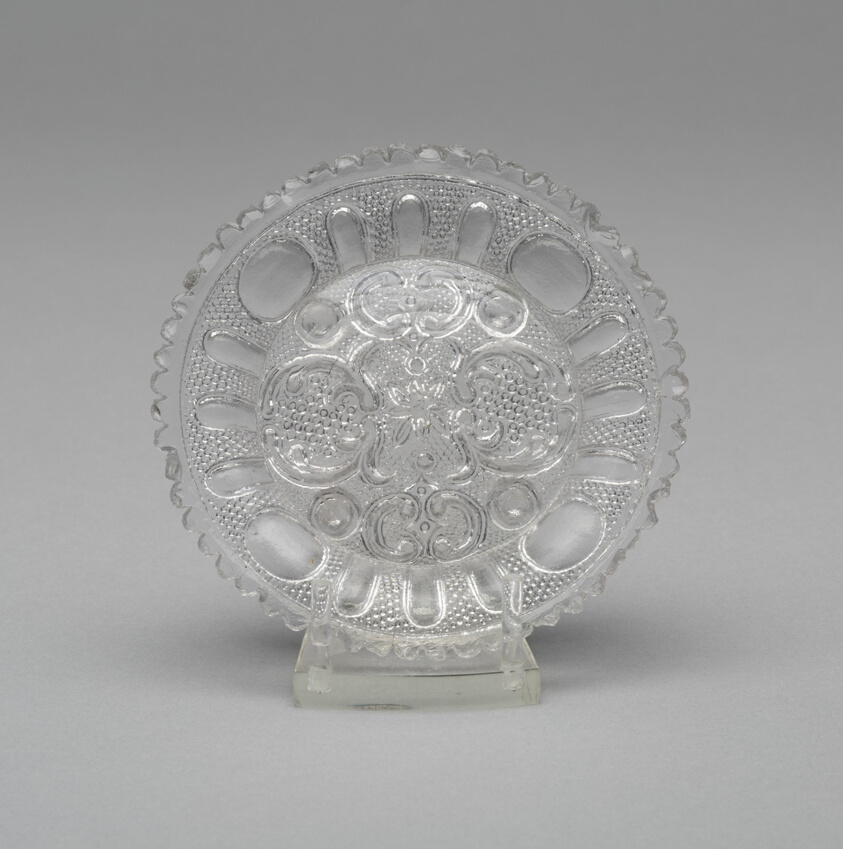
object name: Glass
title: Cup plate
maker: Artist unknown (American, 19th century); Midwest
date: 1830–35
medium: Pressed glass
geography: Midwest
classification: plate (general, dish); glass; american decorative arts; american arts; decorative arts